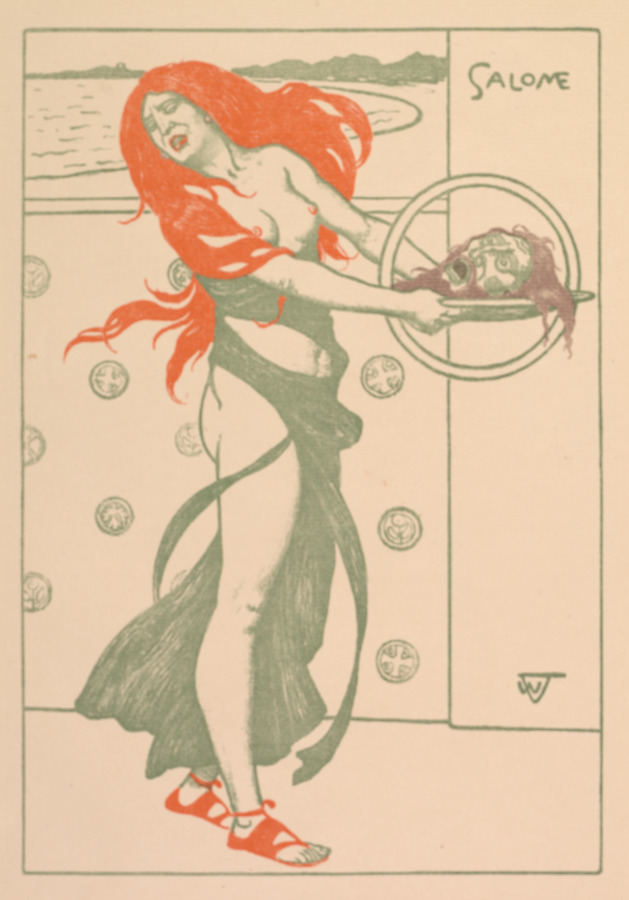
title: Salomé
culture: Germany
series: published in Pan II 3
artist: Wilhelm Volz (German, 1855–1901)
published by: Original lithographie Pan II 3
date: 1896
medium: color lithograph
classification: Print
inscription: In stone, upper right: Salome; lower right, in stone: W.V.In plate: Wilhelm Wolz, Salome